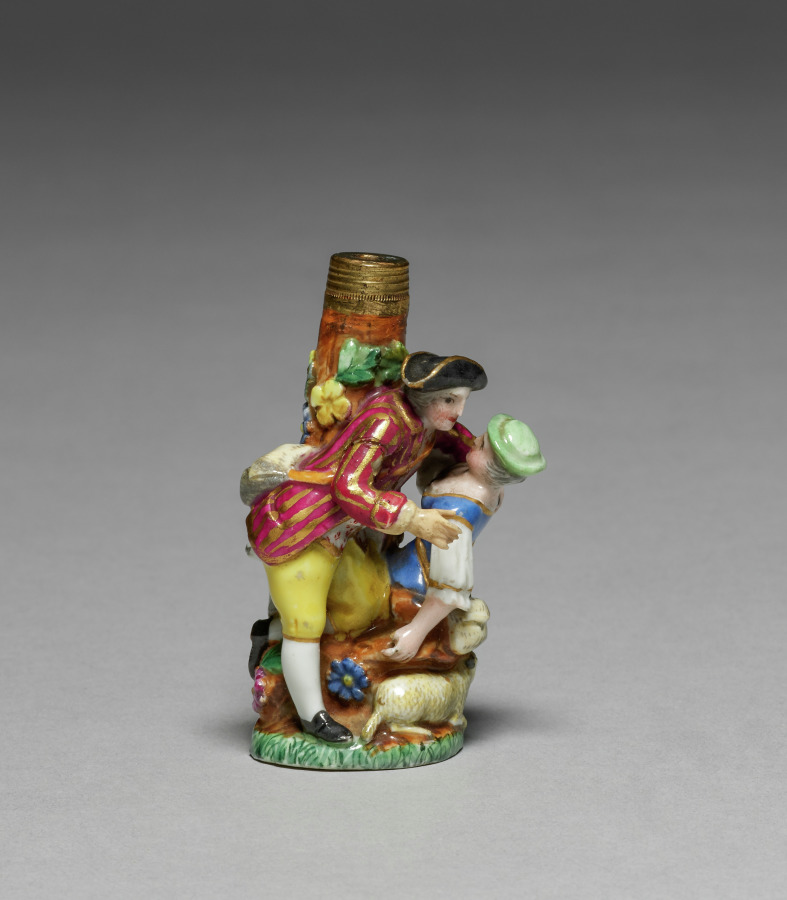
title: Scent Bottle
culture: Germany, Meissen, 19th century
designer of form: manner of Meissen Porcelain Factory (German, est. c. 1710)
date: 1800s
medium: porcelain with gilt metal mounts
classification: Miscellaneous